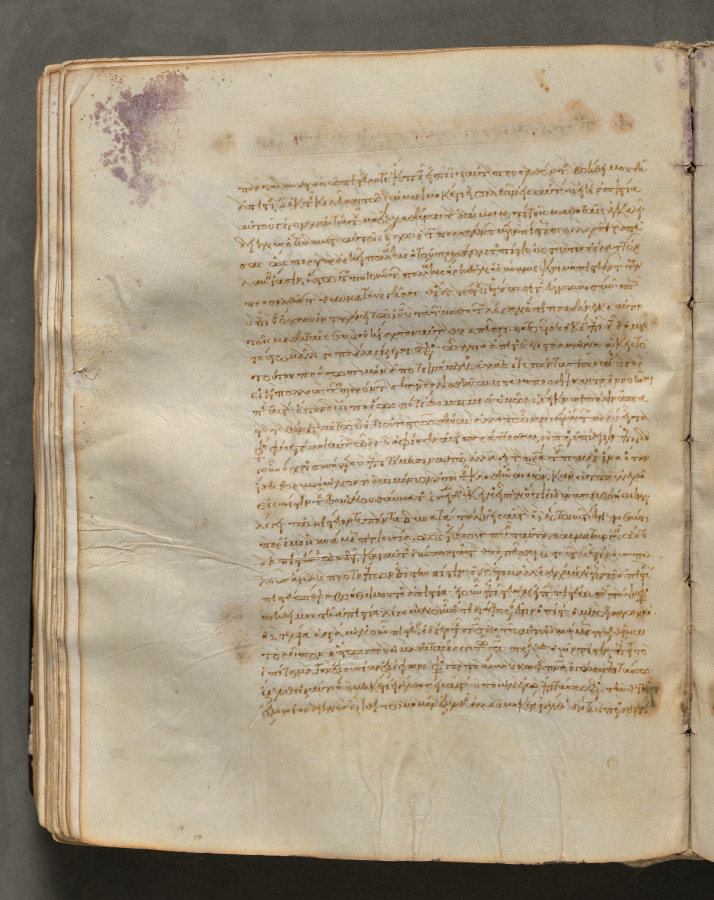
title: Text, folio 164 (verso), from a Gospel Book with Commentaries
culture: Byzantium, Constantinople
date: c. 1000–1100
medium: ink, tempera, and gold on vellum; leather binding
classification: Bound Volume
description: Each of the four gospels in this book opens on a page with brilliantly illuminated borders depicting the author of the text as well as birds-principally peacocks, symbols of the immortality of the soul-and fountains, representing the fountain of life and the salvation of the soul. This volume consists of 428 leaves with texts in Greek. Its level of sophistication suggests that it was probably written and decorated in a monastery in Constantinople.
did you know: Gospel Books were carried in procession through Byzantine churches.